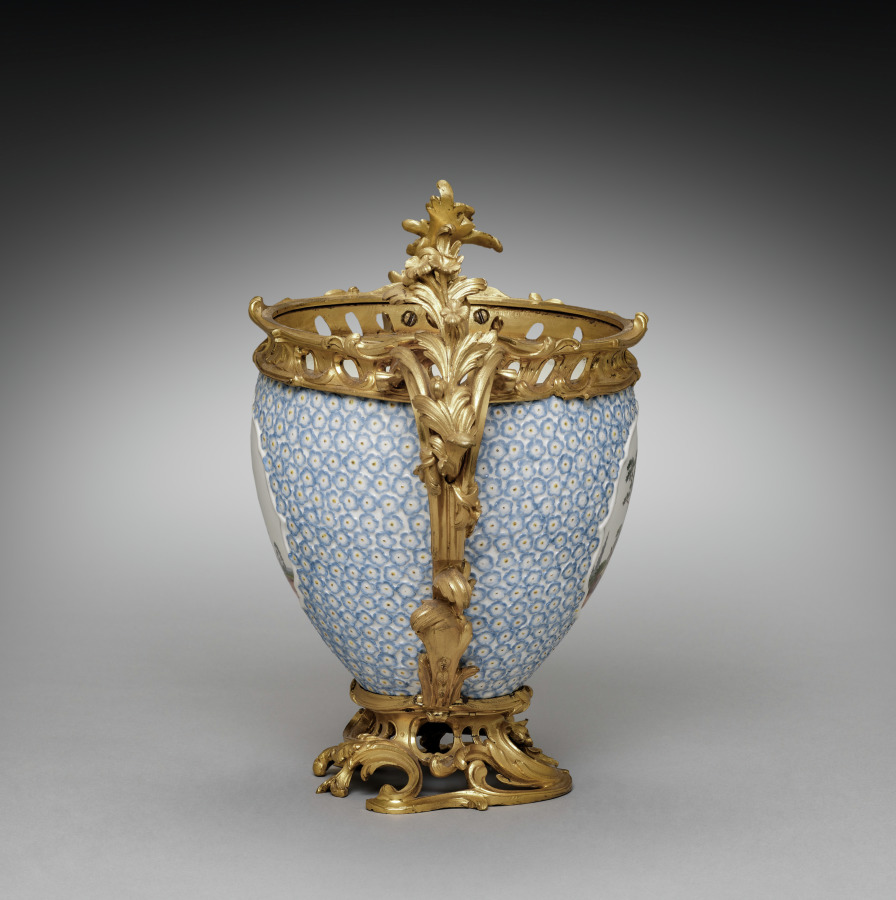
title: Vase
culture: Germany, Meissen, 18th century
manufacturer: Meissen Porcelain Factory (German, est. c. 1710)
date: 1749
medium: porcelain mounted in gilt bronze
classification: Ceramic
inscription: on obelisk located in one of the cartouche openings, the date 1749 appears.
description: One of these vases is dated 1749. They were perhaps part of a set of four covered vases that we know from documents were acquired by Mme. de Pompadour, mistress of Louis XV in 1752.